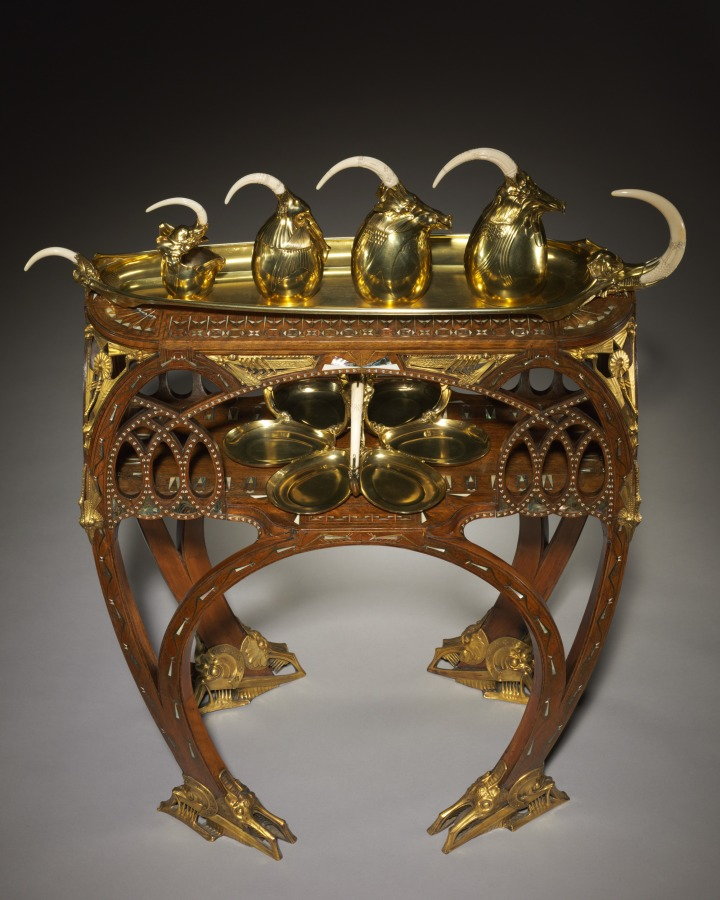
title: Tea Table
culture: France, Paris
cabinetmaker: Carlo Bugatti (Italian, 1856–1940)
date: c. 1907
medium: inlaid wood (mahogany?), cast and gilded bronze mounts, inlays of ivory or bone, metal, and mother-of-pearl (marine mussels or pearl oysters)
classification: Furniture and woodwork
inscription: signed in ligature in white metal inlay on central shelf: Bugatti.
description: Luxurious materials might catch the eye first, but a closer look reveals the imaginary creatures that adorn the surface of this table. Featuring elaborate arches, a favorite motif that appeared throughout Bugatti's furniture, this fantastical imagery is a window into the designer's expressive imagination.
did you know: Carlo Bugatti's sons achieved illustrious careers of their own. Rembrandt Bugatti (1884-1916) became a celebrated sculptor, and Ettore Bugatti (1881-1947) manufactured luxurious automobiles and racing cars.